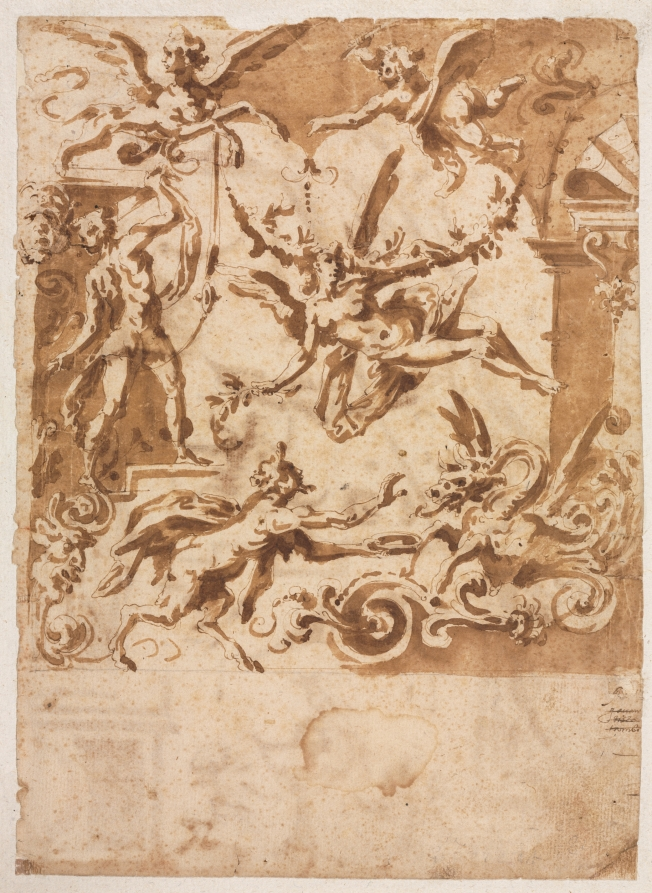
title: Grotesque with a Satyr Feeding a Dragon (recto)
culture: Italy, 16th century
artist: Marco Marchetti (Italian, 1565–1588)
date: c. 1565/1588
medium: pen and brown ink and brush and brown wash, over traces of black chalk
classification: Drawing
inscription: lower right, by unknown hand, in brown ink: g[illegible] / [gauani ?][crossed out] / Fisza [crossed out] / tromb. [crossed out]